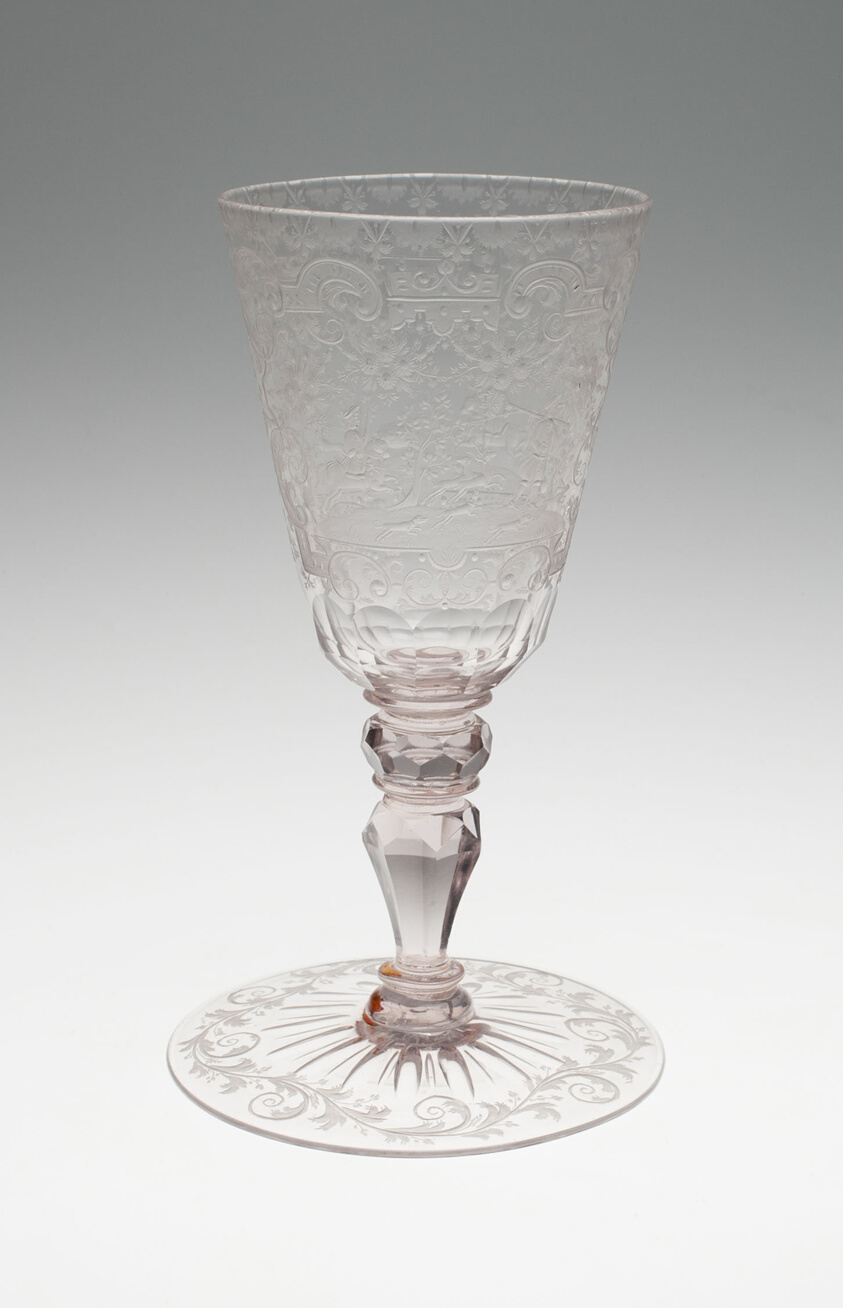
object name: Glass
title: Goblet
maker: Schleswig, Germany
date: c. 1725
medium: Glass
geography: Schleswig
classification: drinking vessel; glass; european decorative arts